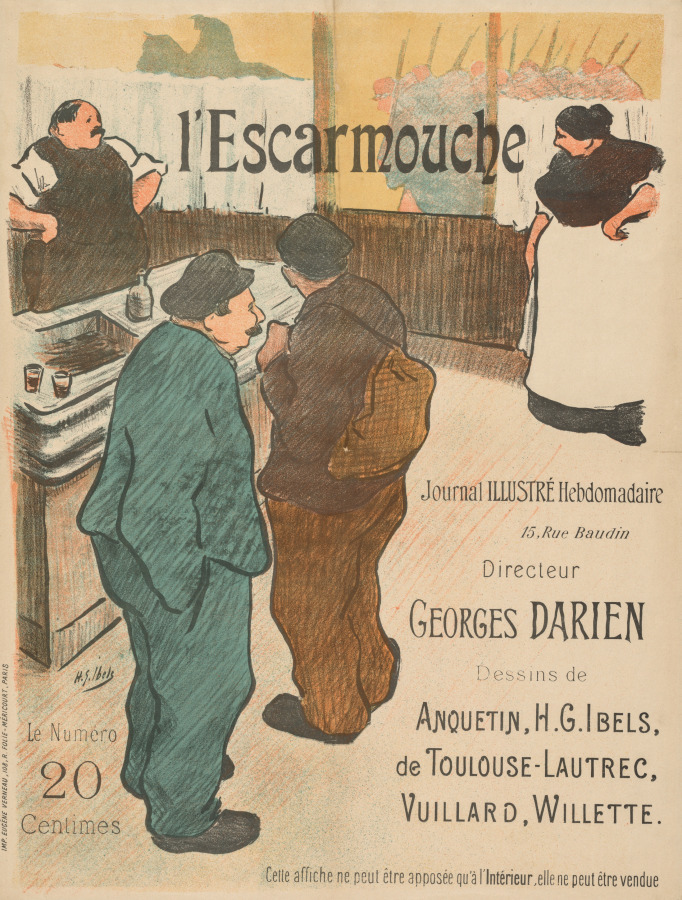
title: Illustration for L'Escarmouche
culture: France, 19th century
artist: Henri Gabriel Ibels (French, 1867–1936)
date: c. 1893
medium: lithograph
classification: Print